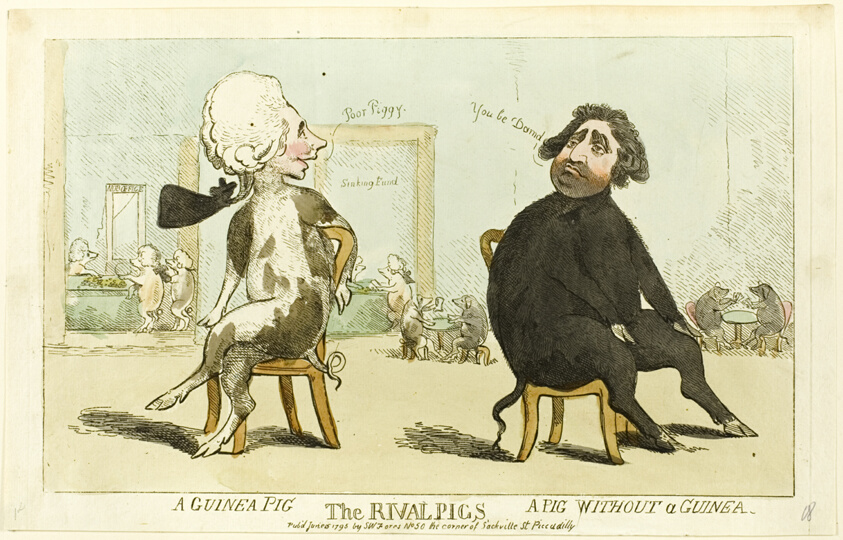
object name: Print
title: The Rival Pigs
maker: Isaac Cruikshank (English, 1764-1811); published by S.W. Fores (English, 1761-1838)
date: published June 15, 1795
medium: Hand-colored etching on ivory laid paper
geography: England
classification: etching; print; prints and drawing